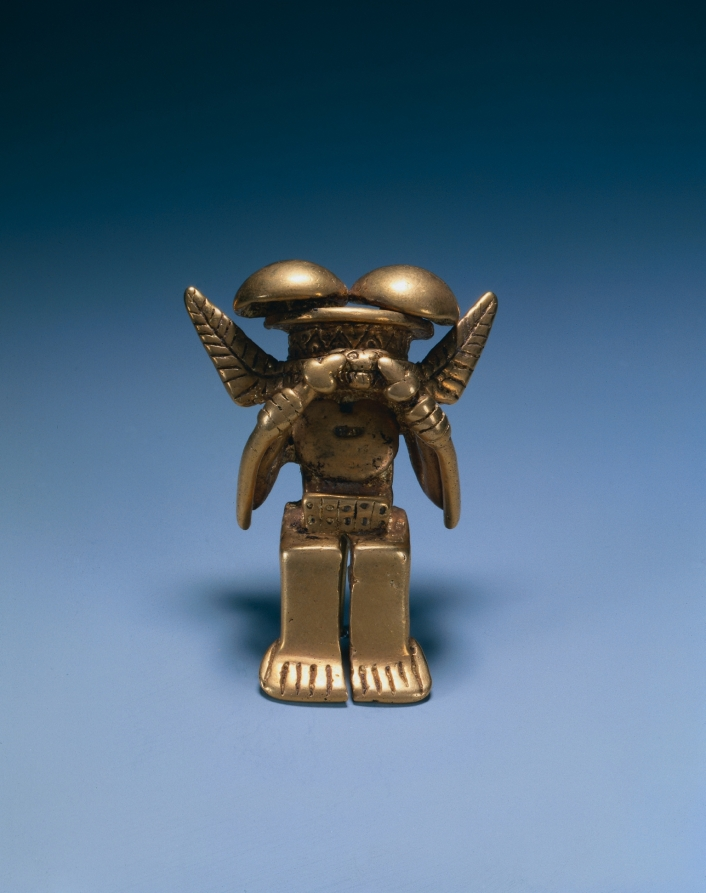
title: Animal-Headed Figure Pendant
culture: Colombia, Quimbaya or Yotoco style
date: 1–800 CE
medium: cast gold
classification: Metalwork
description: The same creature, with a human body but the head of an animal, appears in both pendants. It holds batons to its mouth, and whiskers or ears flare from the sides of the head. The headdress domes are mystifying; they have been described as mushrooms or gourds, among other things.